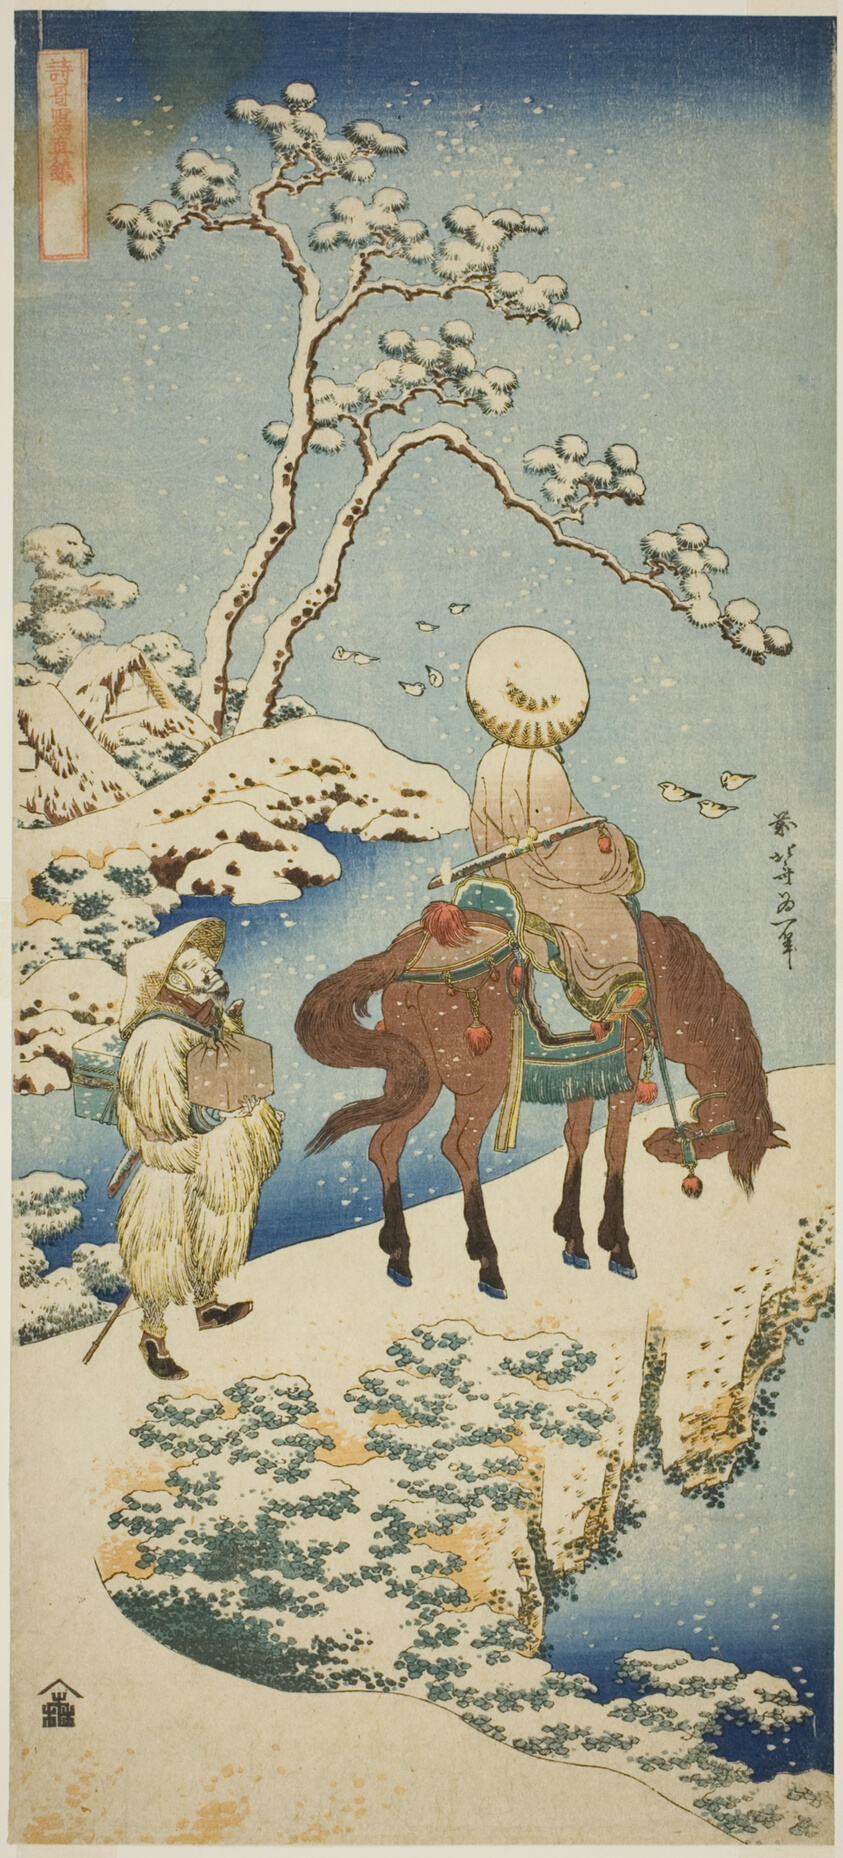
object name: Print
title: Horseman in Snow, from the series "A True Mirror of Japanese and Chinese Poems (Shiika shashin kyo)"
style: Japanese (culture or style)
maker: Katsushika Hokusai 葛飾 北斎; Japanese, 1760-1849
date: c. 1833/34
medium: Color woodblock print; vertical nagaban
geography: Japan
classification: woodblock print; print; asian art